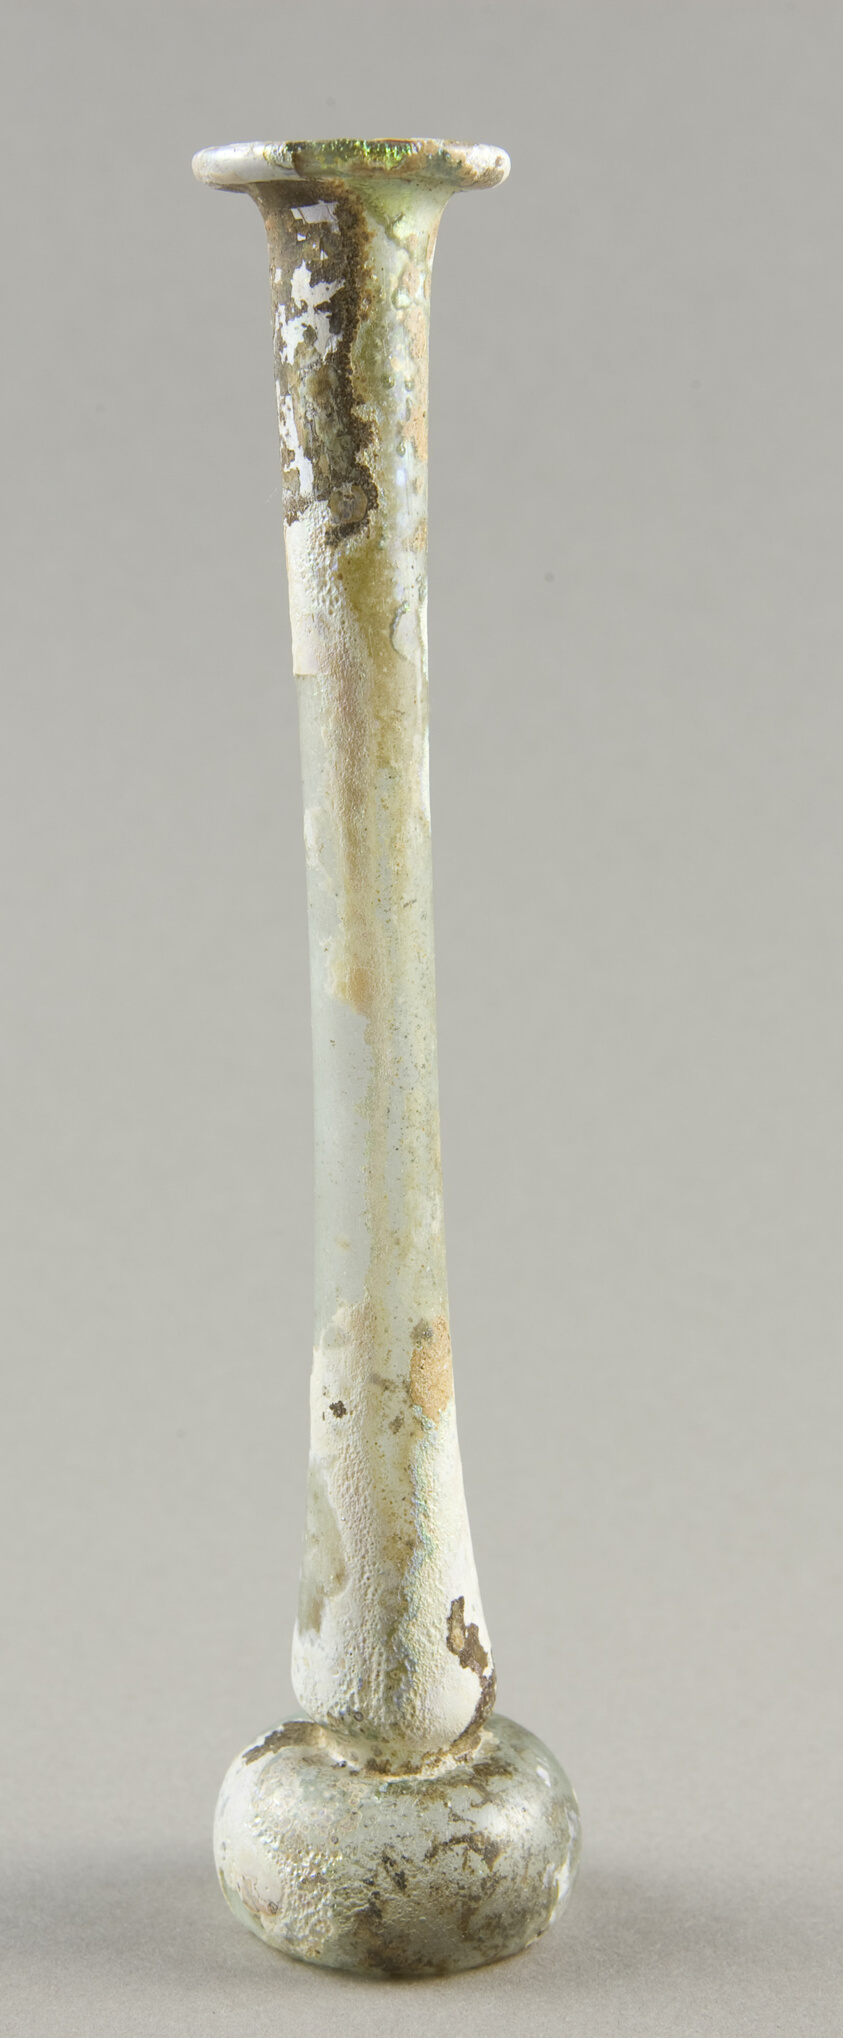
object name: Vessel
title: Bottle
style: syrian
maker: Roman; Levant or Syria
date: 1st century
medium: Glass, blown technique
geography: Syria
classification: bottle; glass; vessel; ancient art